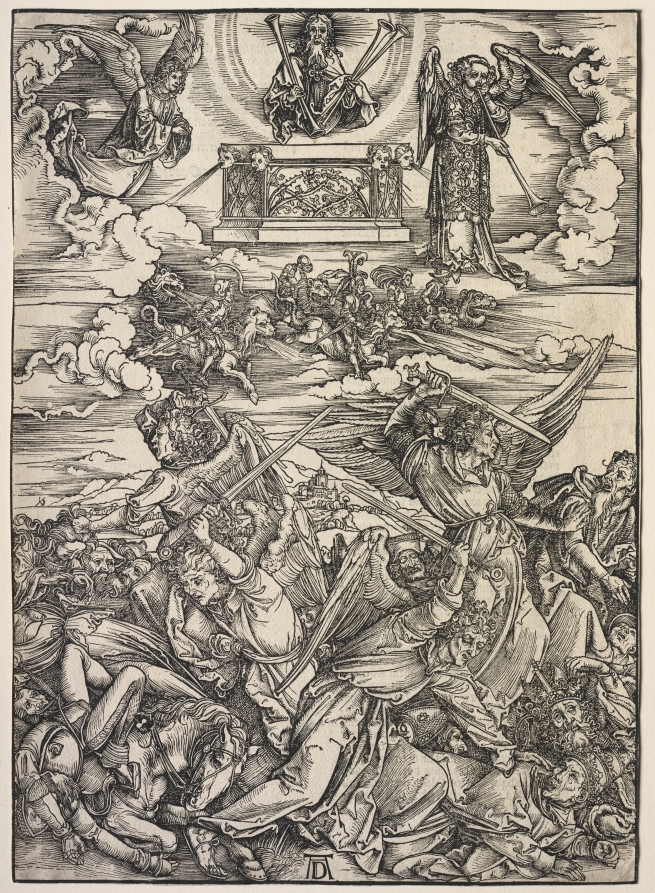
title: Revelation of St. John: The Four Destroying Angels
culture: Germany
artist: Albrecht Dürer (German, 1471–1528)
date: 1511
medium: woodcut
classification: Print